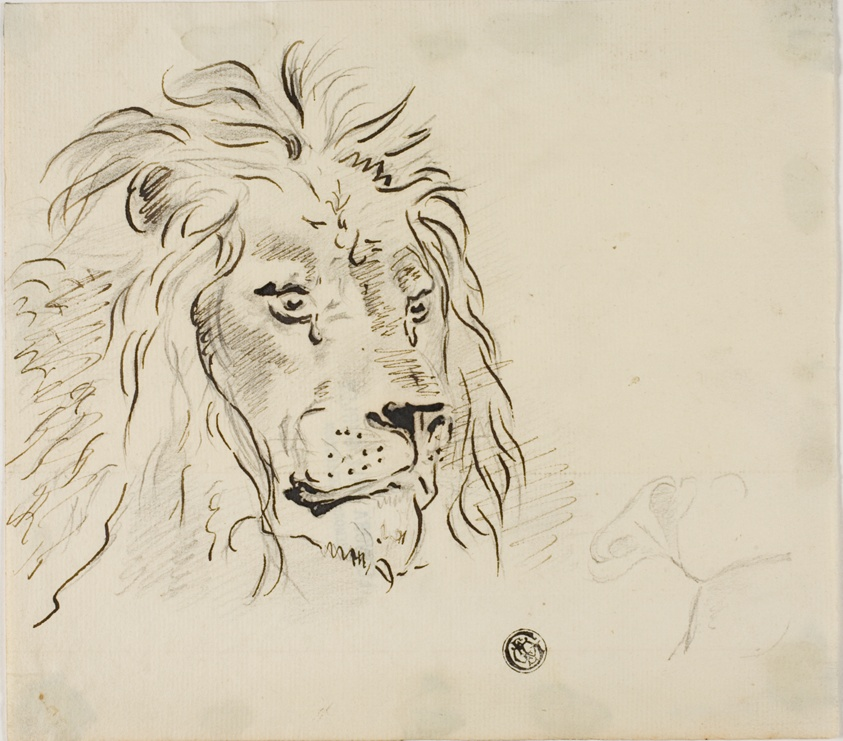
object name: Drawing and Watercolor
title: Lion's Head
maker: Sawrey Gilpin (English, 1733-1807); or James Ward (English, 1769-1859)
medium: Pen and black ink, with graphite, on cream laid paper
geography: England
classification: pen and ink drawings; drawings (visual works); prints and drawing